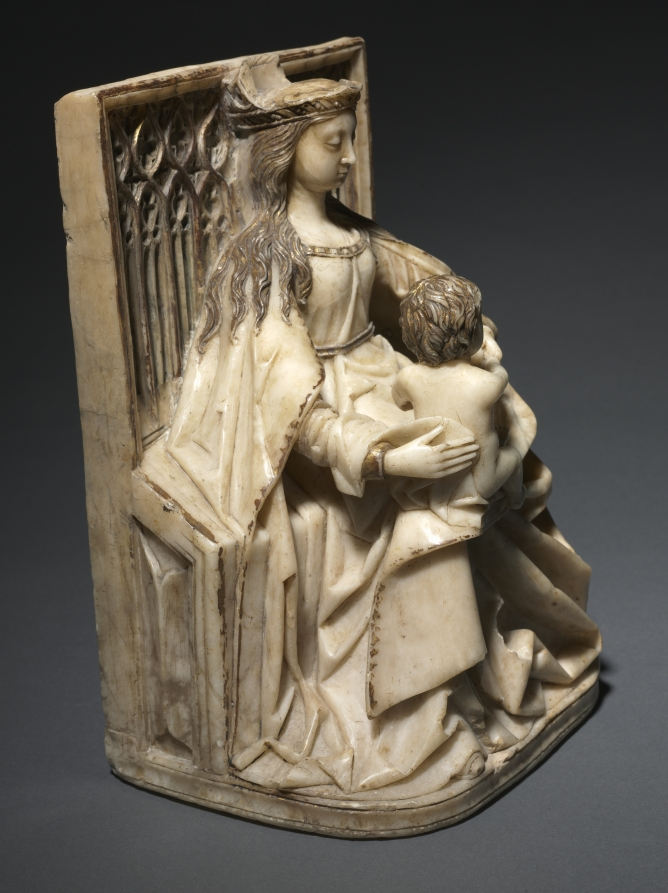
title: Enthroned Virgin and Child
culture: Spain, Burgos, 15th century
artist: Gil de Siloé (Spanish, active c. 1475–1505)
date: c. 1480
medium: alabaster with traces of gilding and polychromy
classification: Sculpture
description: The seated Virgin Mary with Christ is one of the most popular themes in Christian art of the Middle Ages. Alabaster was an ideal material to depict the fleshiness of Jesus, the lush folds of Mary’s cloak, and the fine details of the throne and gown. Christ is reaching for something in his mother’s hand that is now unrecognizable because alabaster tends to break or wear away quickly. It may have been a book or a piece of fruit. Given its small size, it is likely that this sculpture was intended for private use.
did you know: This sculpture was possibly made for Queen Isabella, the Spanish ruler who sponsored Christopher Columbus.